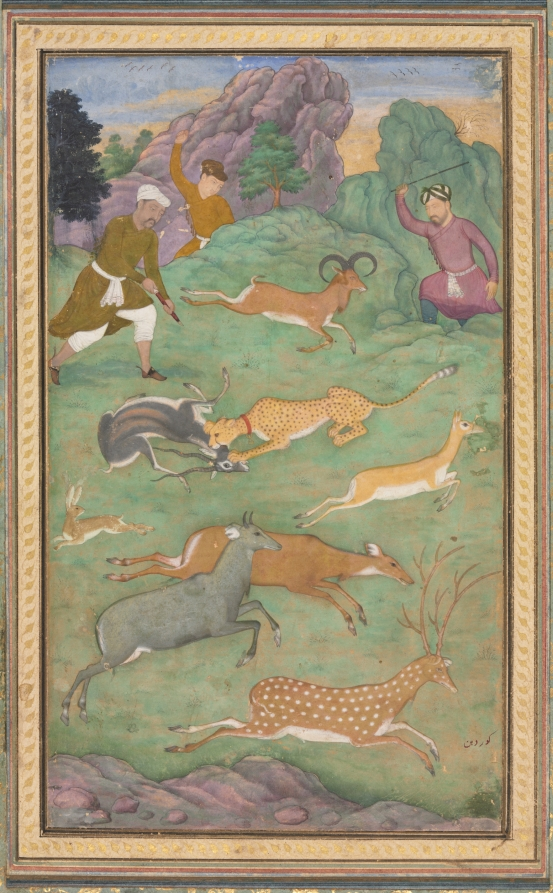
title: Antelope and deer hunt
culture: Mughal India, Allahabad, made for Prince Salim (1569–1627)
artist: Govardhan (Indian, active c.1596–1645)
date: c. 1602–4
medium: Gum tempera and gold on paper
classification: Painting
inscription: recto, lower right: Govardhan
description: The Mughals used trained cheetahs, such as this one wearing a red collar, to capture prey during hunting expeditions in the wilderness. The metaphor of the hunt was also a potent image in Persian literature, in which the protagonist finally achieves a desired goal. The central image of the cheetah catching the black buck—a frequently repeated visual trope—resonates with the desire of Prince Salim (who was passionate about hunting) to capture the throne of the Mughal Empire from Akbar, his father. Between 1600 and 1605, when Prince Salim set up his own royal court in defiance of his father, he convinced some imperial artists to join him. The young Govardhan, a Hindu who would go on to achieve high stature in the atelier of the next two emperors, was one of them.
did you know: The gray antelope in the foreground is called a nilgai and is the largest antelope in Asia.